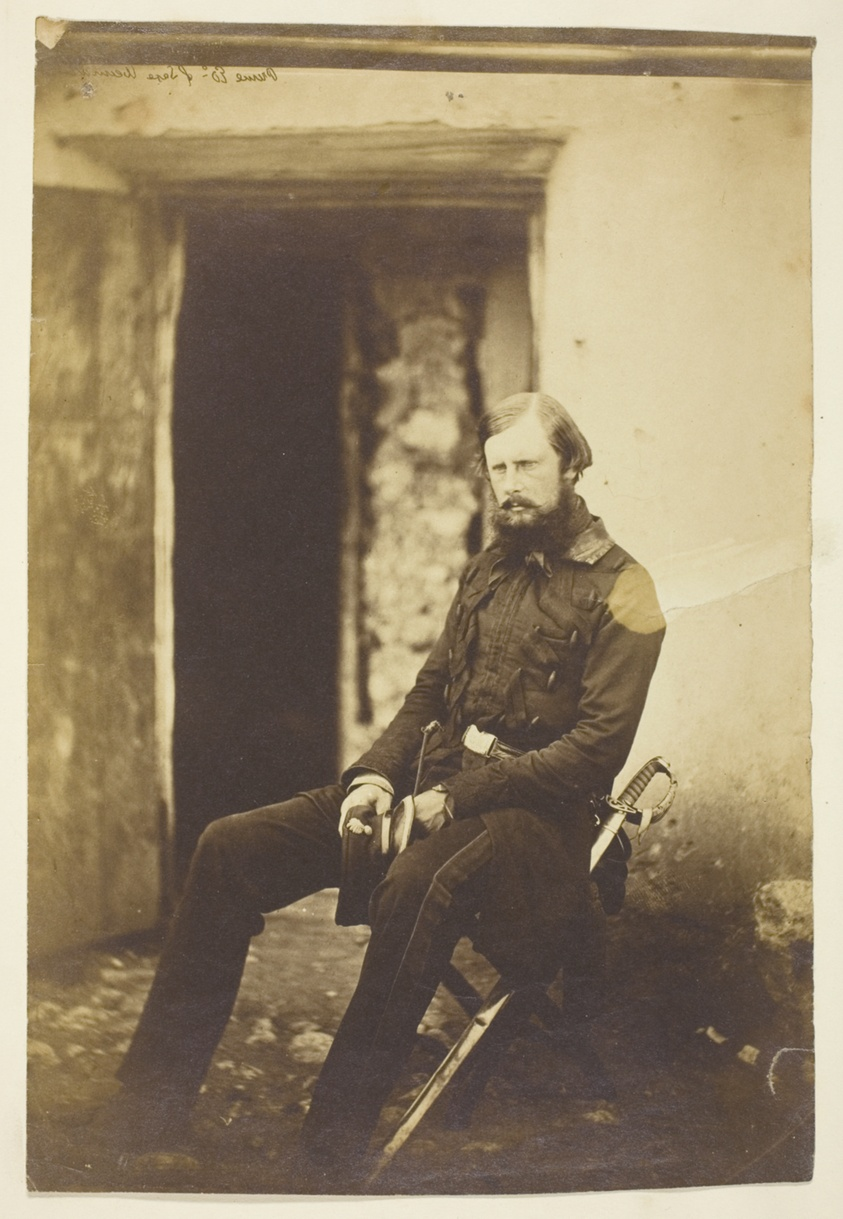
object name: Photograph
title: Prince Edward of Saxe Weimar, Taken on the Field, Crimea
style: 19th century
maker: Roger Fenton (English, 1819–1869)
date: 1855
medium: Thinly albumenized print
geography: England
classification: albumen silver print; photographic process; photography; photograph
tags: Collected by Hugh Edwards